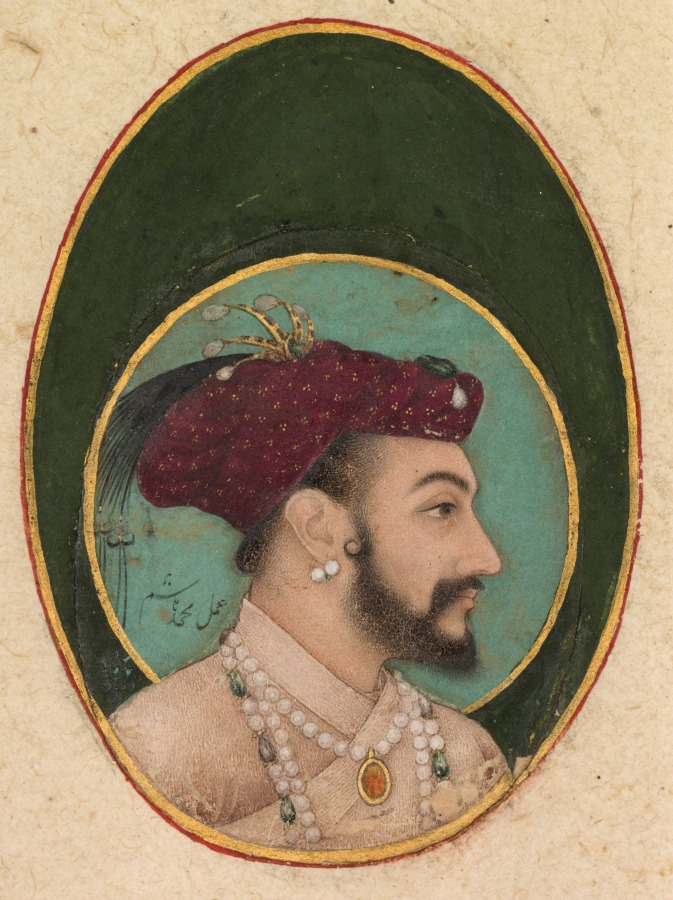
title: Shah Jahan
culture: India, Mughal Period (1526-1756)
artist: Hashim (Indian, active 1598-c.1650)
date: c. 1630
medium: Gum tempera, ink, and gold on paper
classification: Painting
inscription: signed: amal-i Muhammad Hashin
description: This sensitive portrait jewel was probably painted shortly after Shah Jahan came to the throne of the powerful Mughal Empire in 1628 after the death of his father, Jahangir. He decided to wear a full beard, in reference to his increased orthodoxy in comparison to his more liberal father and grandfather. The artist’s signature appears behind Shah Jahan’s nape.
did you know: This portrait belonged to Cleveland mogul Jeptha H. Wade II, a cofounder of CMA.